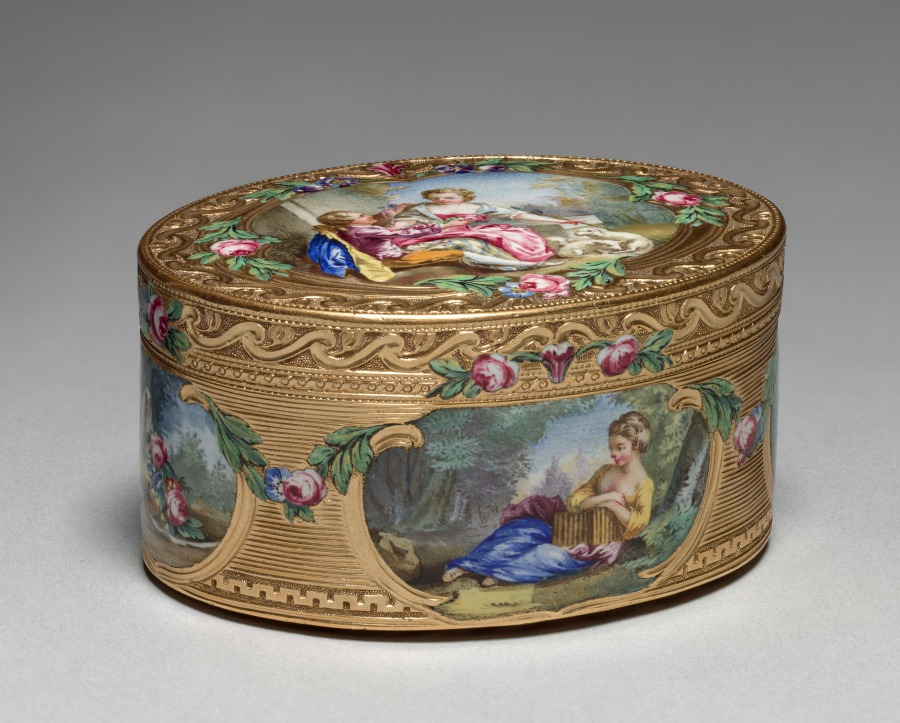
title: Snuff Box (Tabatière)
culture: France, 18th century (style of Louis XV)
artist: Francois Guillaume Tiron (French)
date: 1761–62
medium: gold and enamel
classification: Miscellaneous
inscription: [Maker's mark of Francois-Guillaume Tiron, master goldsmith in 1747, inside cover]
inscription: [Warden's mark, Paris, 1761-1762, inside cover]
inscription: [Charge mark of Eloi Brichard and Etienne Somfoye, Paris, 1756-1762, inside cover]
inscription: [Maker's mark of Francois-Guillaume Tiron, inside bottom]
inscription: [Warden's mark, 1761-1762, inside bottom]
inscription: [Charge mark of Brichard and Somfoye, inside bottom]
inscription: [Maker's mark of FG Tiron, left wall]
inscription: [Charge mark of Brichard and Somfoye, left wall]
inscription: [Warden's mark, Paris, 1761-1762, left wall]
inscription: [Discharge mark of J.J. Prevost, Paris, 1762-1768, bezel at right]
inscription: [Engraved number, maybe retailer's number]: "n. 13676"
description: The pastoral scenes that decorate this box are typical of the style of François Boucher, a celebrated painter of the period whose works were popularly reproduced on decorative arts. Snuff boxes, used practically as containers for powdered tobacco, were often decorated with miniature reproductions of notable works. The miniature on the cover is inspired by Boucher’s The Galant Pastor (Le Pasteur Gallant) (1738) and that on the bottom by The Amusement of the Shepherd Girl (L’Amusement de la Bergère) (1700s).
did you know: François Boucher was a favorite of the French royal court of Louis XV and named first painter of the king in 1765.